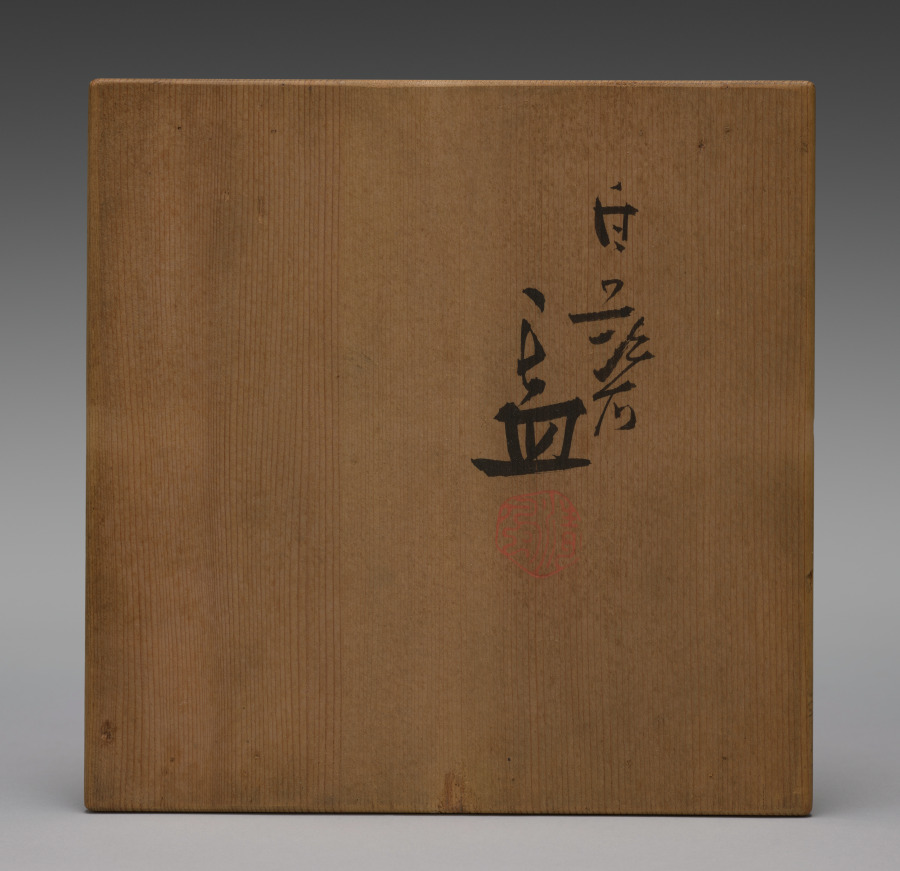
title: Bowl with Dragons Chasing Flaming Jewels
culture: Japan, Meiji period (1868–1912) to Taishō period (1912–26)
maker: Seifū Yohei III (Japanese, 1851–1914)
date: 1893–97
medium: Porcelain with molded and carved design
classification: Ceramic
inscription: 大日本清風造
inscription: 清風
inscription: 清風與平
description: The decoration of this large bowl, described as a donburi on one side of its box, is executed entirely in molded and carved relief under a creamy, pink-tinged translucent glaze. The main motif is a pair of four-clawed dragons pursuing flaming jewels. As is standard for this design, the beasts are surrounded by wisps of cloud, and a foliate pattern runs around the bottom of the basin. A geometric pattern circles the exterior of the footring. The white-on-white design makes the bowl subtle and elegant.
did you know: Kyoto-based Japanese ceramist Seifū Yohei III (1851–1914) admired the glaze colors found on Chinese porcelain and tried to replicate them through intensive experimentation.